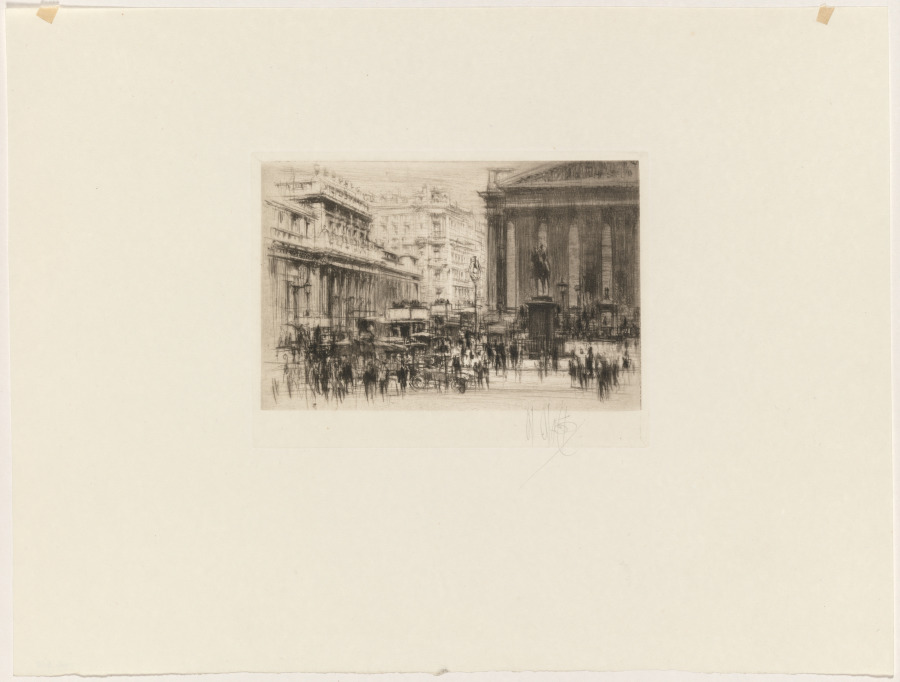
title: London Set: Bank (with the Royal Exchange)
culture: Britain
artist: William Walcot (British, 1874–1943)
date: 1924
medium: etching on wove paper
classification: Print